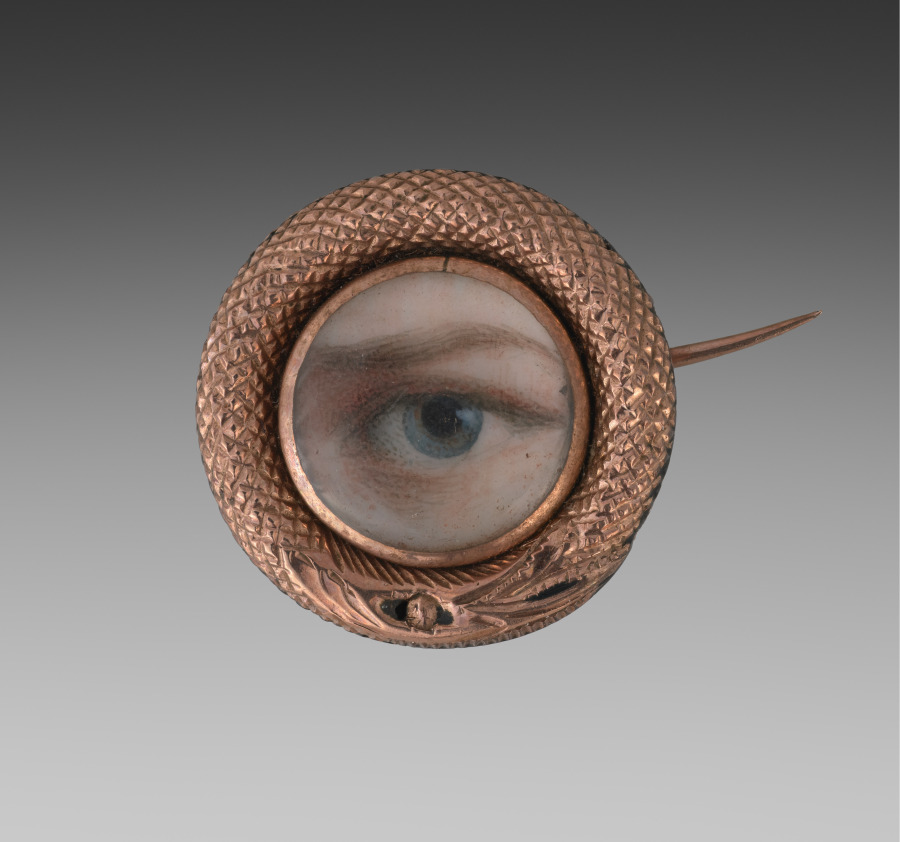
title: Eye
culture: America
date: 1900s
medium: watercolor on ivory set in brooch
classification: Portrait Miniature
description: Eye miniatures were popular in Europe between 1790 and 1830. Only in a few extraordinary cases do we know whose eyes were painted. Their limited scope makes it almost impossible to identify the artist, though we know that many famous miniaturists painted eye portraits including John Smart, Richard Cosway, and George Engleheart. Because the artist and the sitter could be known only to the person who commissioned or received the object, these eyes are distinguished from miniatures and portraits for their private significance and mystery. There are six eye miniatures in the Cleveland Museum of Art's collection. In 2000, three of the CMA's eye miniatures appeared in an exhibition on Alfred Hitchcock and art, highlighting their eerie fascination for modern viewers and their relationship to Surrealism and issues of surveillance.